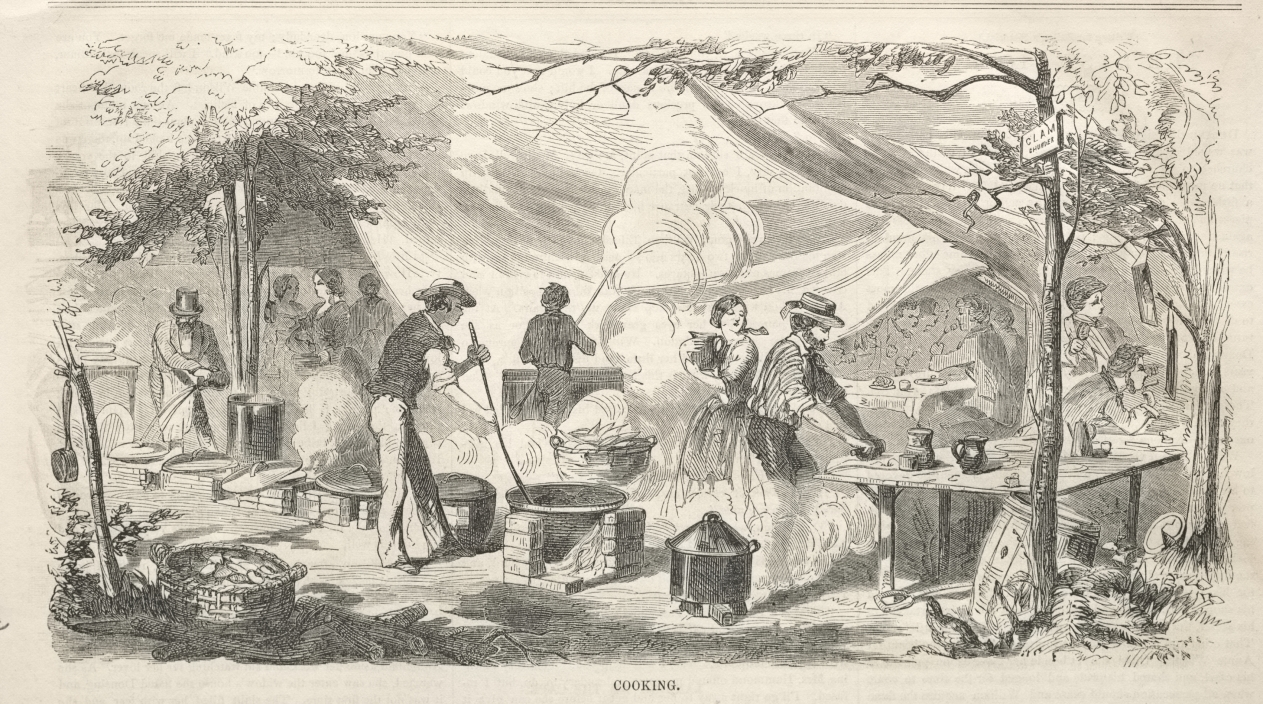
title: Camp Meeting Sketches: Cooking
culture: America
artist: Winslow Homer (American, 1836–1910)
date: 1858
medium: wood engraving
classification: Print